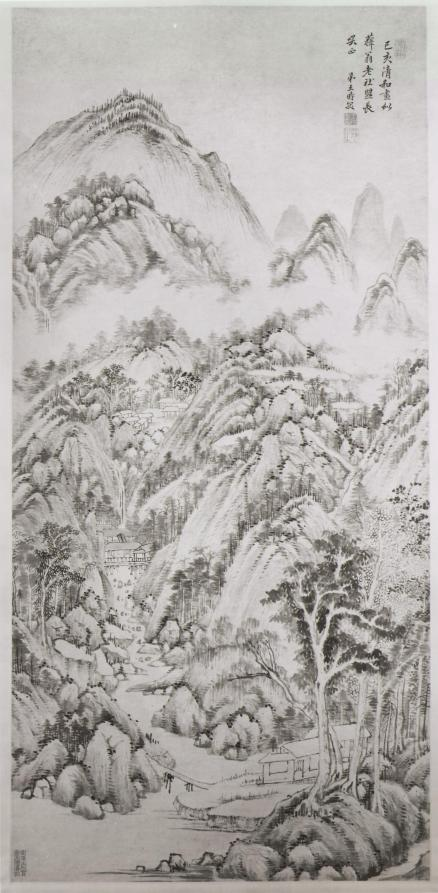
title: Mountain Village Embraced by the Summer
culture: China, Qing dynasty (1644-1911)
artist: Wang Shimin (Chinese, 1592–1680)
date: 1659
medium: hanging scroll, ink on paper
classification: Painting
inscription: Artist's inscription, signature, and 3 seals: [seal] Ouxie 偶諧. In the jihai year [1659], the fourth lunar month, I painted this for T'o-weng, my senior in our literary club, for your amusement and correction. Your junior Wang Shimin. [seals] Wang Shimin yin 王時敏印; Xunzhi 遜之.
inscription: 2 additional seals: 1 of Jiang Gusun [Chiang Ku-sun] 將穀孫 (20th century); 1 of C. C. Wang 王季遷 (1907–2003).